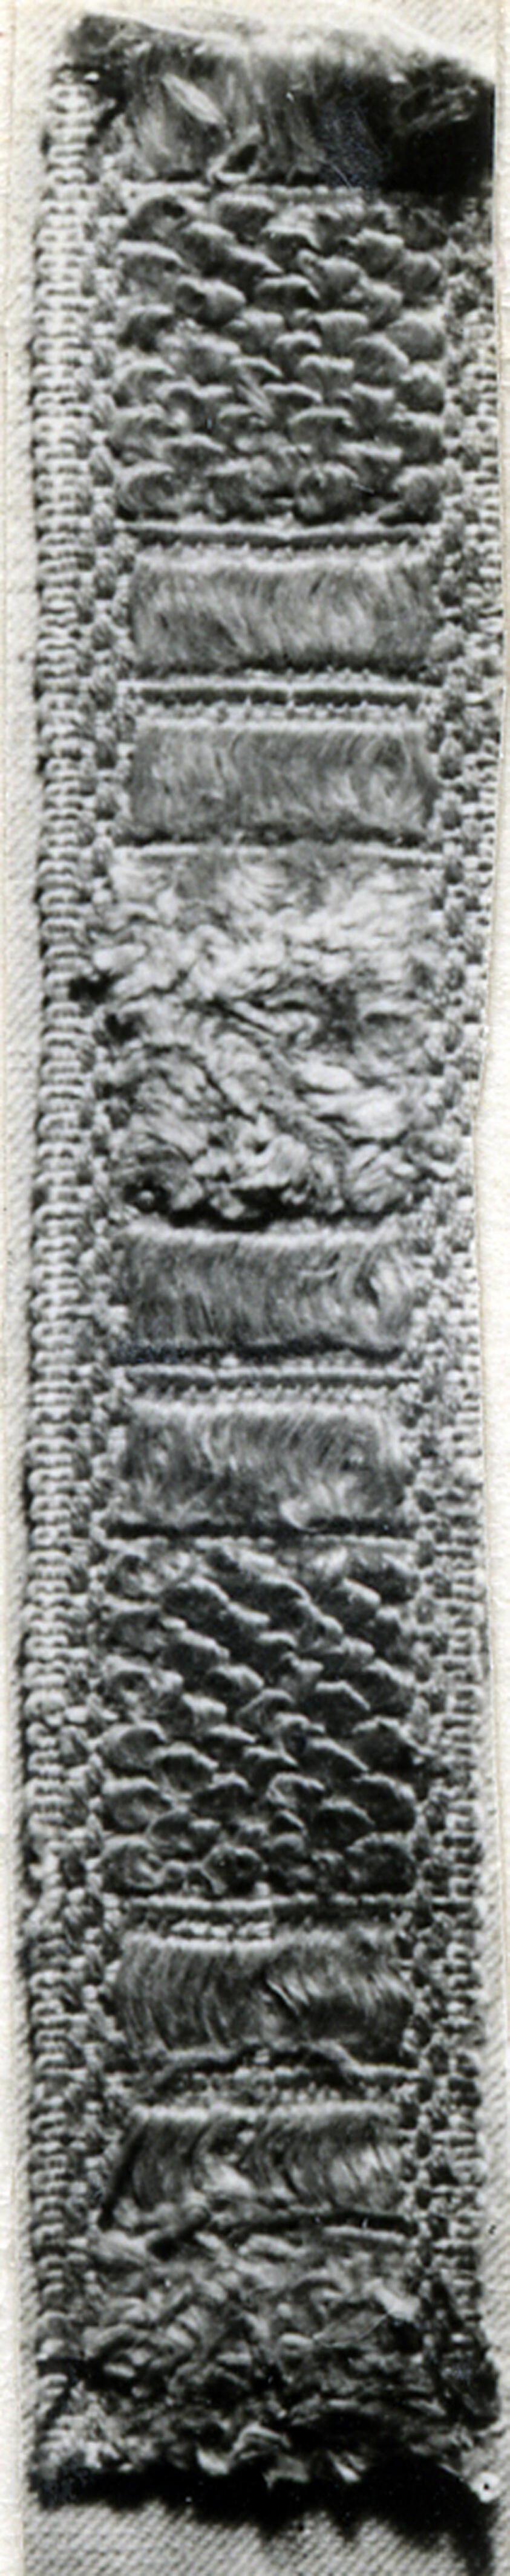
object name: Textile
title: Galloon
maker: Italy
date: 17th/18th century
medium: silk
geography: Italy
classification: textile; weaving